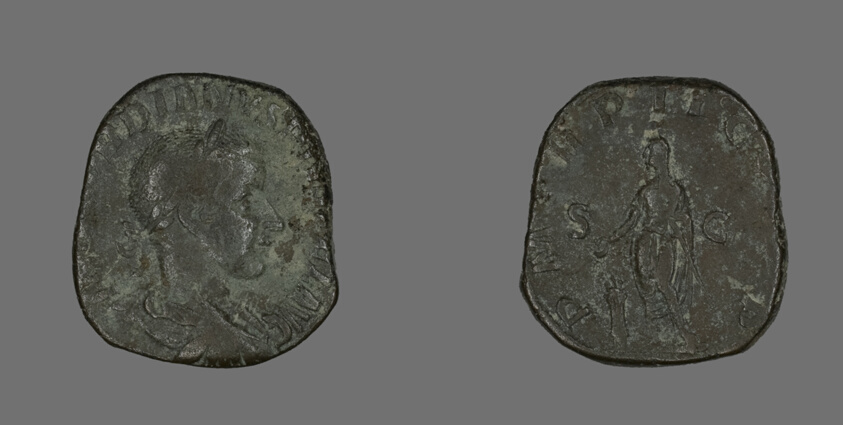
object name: Coin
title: Sestertius (Coin) Portraying Emperor Gordianus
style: roman (ancient, style or period), ancient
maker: Roman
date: 238-244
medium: Bronze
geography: Roman Empire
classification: coin; ancient art